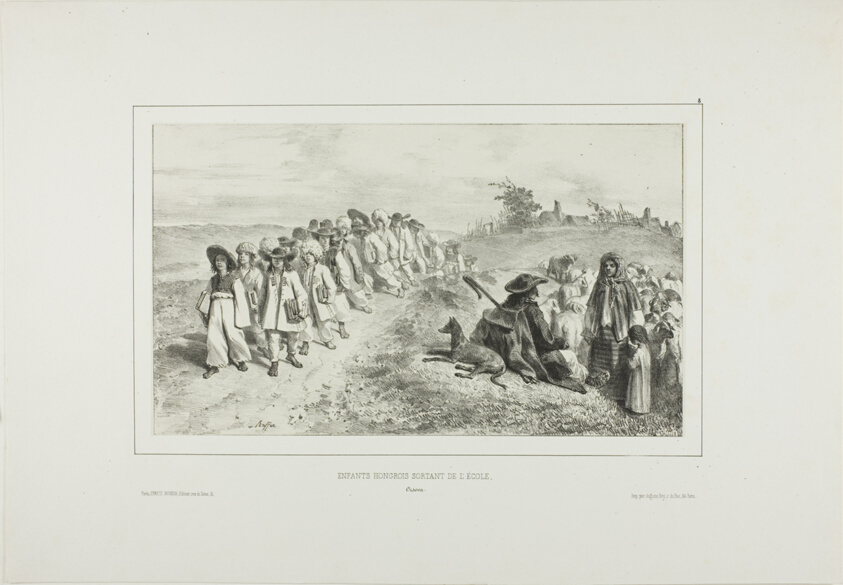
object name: Print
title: Hungarian Children Going to School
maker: Denis Auguste Marie Raffet (French, 1804-1860); printed by Auguste Bry (French, 19th century); published by Éditeur Ernest Bourdin (French, active 19th century)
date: 1838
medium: Lithograph in black on gray chine laid down on ivory wove paper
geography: France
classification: lithograph; print; prints and drawing